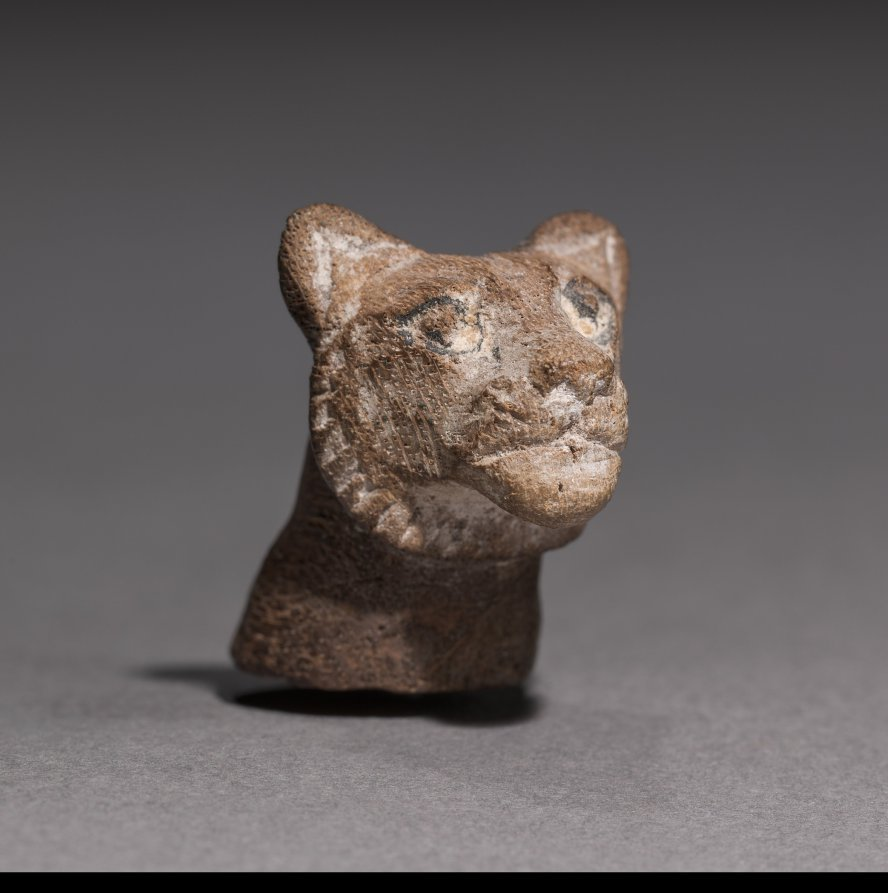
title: Lion Head, perhaps a Steering Oar Butt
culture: Egypt, probably Middle Kingdom (2040–1648 BCE)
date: 2040–1648 BCE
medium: wood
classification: Funerary Equipment